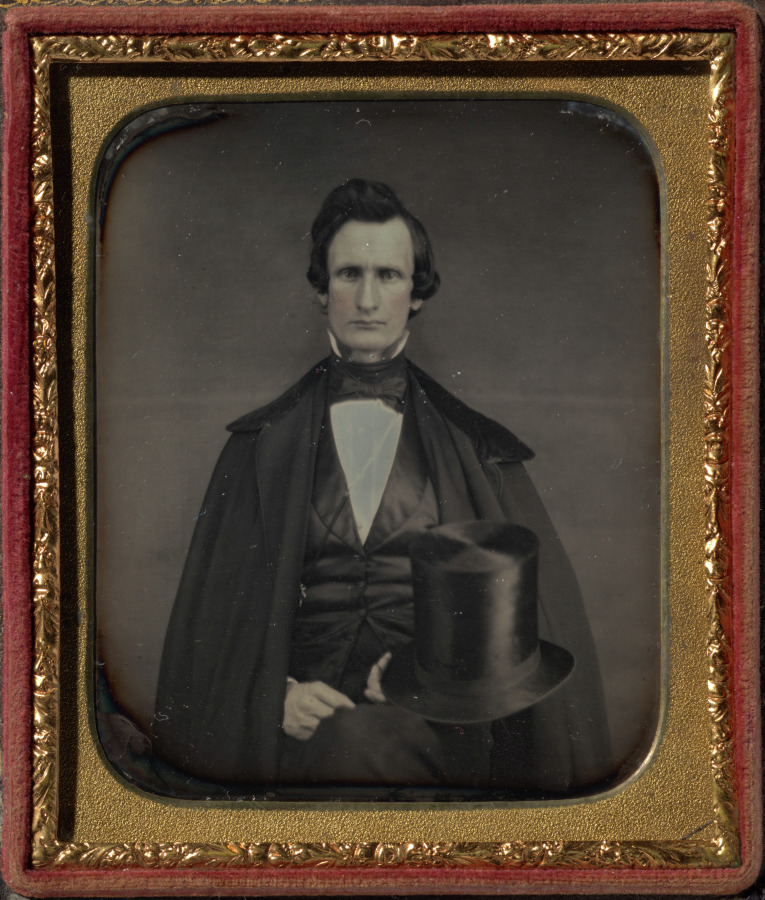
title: Magician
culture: America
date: c. 1850–55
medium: daguerreotype, sixth plate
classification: Photograph